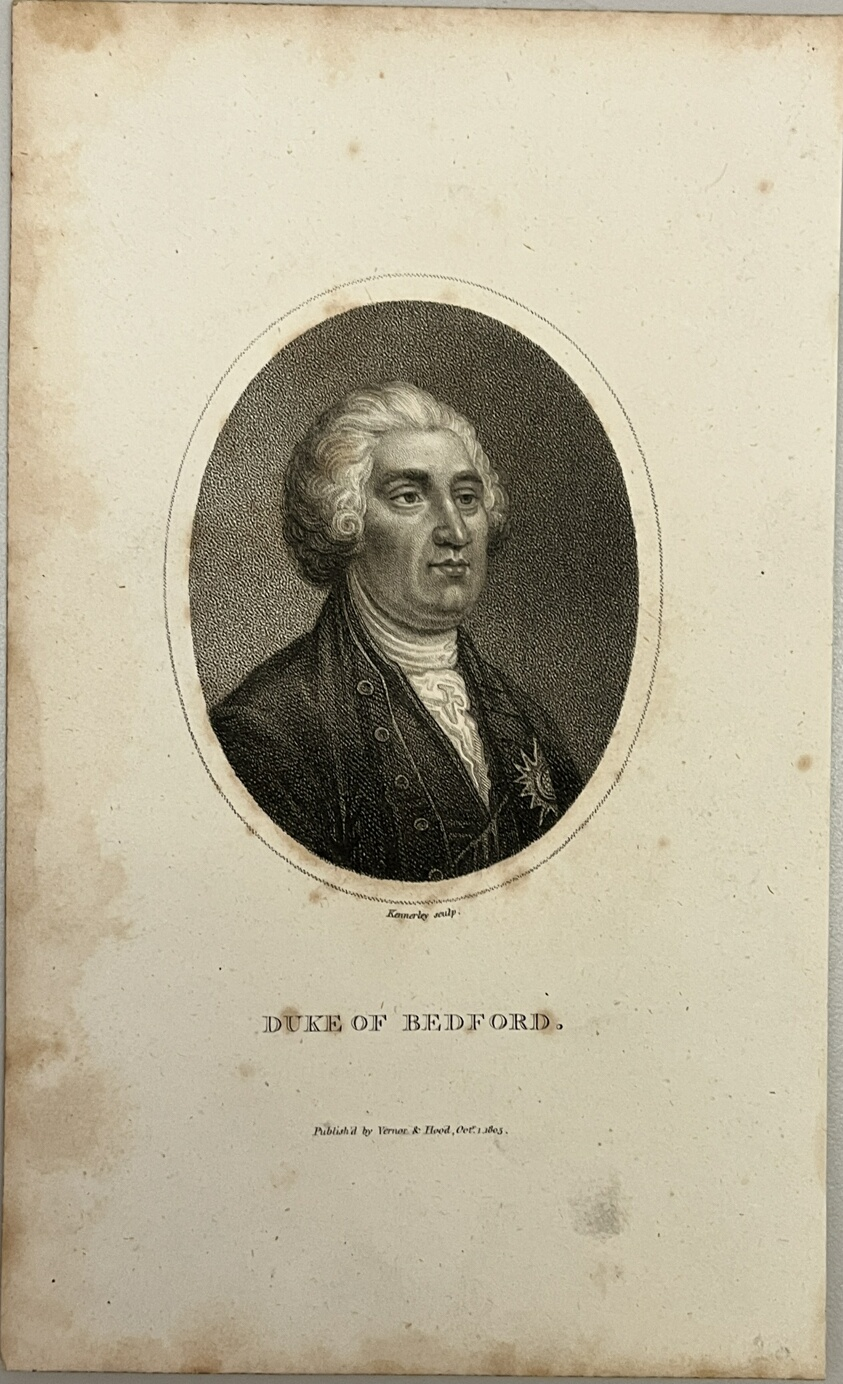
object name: Print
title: Duke of Bedford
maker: John Kennerley (British, active 1804-1836); published by Vernor & Hood (British, active 1795-1810)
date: 1805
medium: Etching on paper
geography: England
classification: reproduction; print; prints and drawing